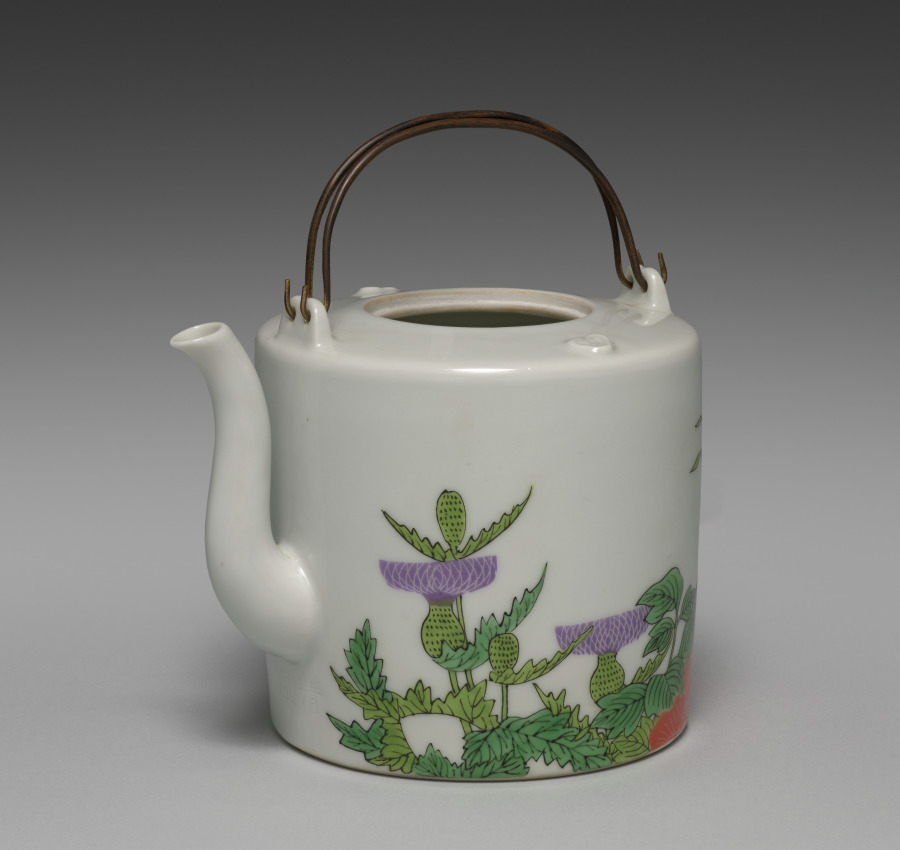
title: Sake Pourer with Flowers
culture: Japan, Meiji period (1868–1912)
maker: Seifū Yohei III (Japanese, 1851–1914)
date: 1893–1914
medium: Porcelain with molded design, overglaze color enamel, and metal handles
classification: Ceramic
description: This sake pourer is of a type called a chōshi. It is elaborately decorated with flowers in overglaze enamels in several colors, including black for the contour lines of leaves and stems; orange, white, gold, and two shades of green for the peonies; and purple for the thistles. The white blossoms have been built up with white enamel, then incised for a white-on-white eect; the orange and purple use an absence of color to produce the contours of individual petals. Yohei III referred to his works in multicolor overglaze enamels as “hundred flower brocades” (hyakka nishiki). Two small nyoi (C. ruyi) staff-head motifs, molded in clay and applied to either side of the lid, create handle rests, as well as natural places for the thumb and index finger of one hand to rest, so one can both secure the lid and steady the pour, while the handles are held in the other hand. The top of a nyoi staff resembles the curled cap of the reishi. Such scepters are imagined to be found in the hands of sages, Daoist immortals, or Buddhist deities and connote lofty goings-on and favorable circumstances. Since this sake pourer is unsigned, it may have been made for imperial family members to give as a gift.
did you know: This sake pourer with purple thistles and orange peonies shows off Seifū Yohei III’s technique of enamels painted over the glaze.